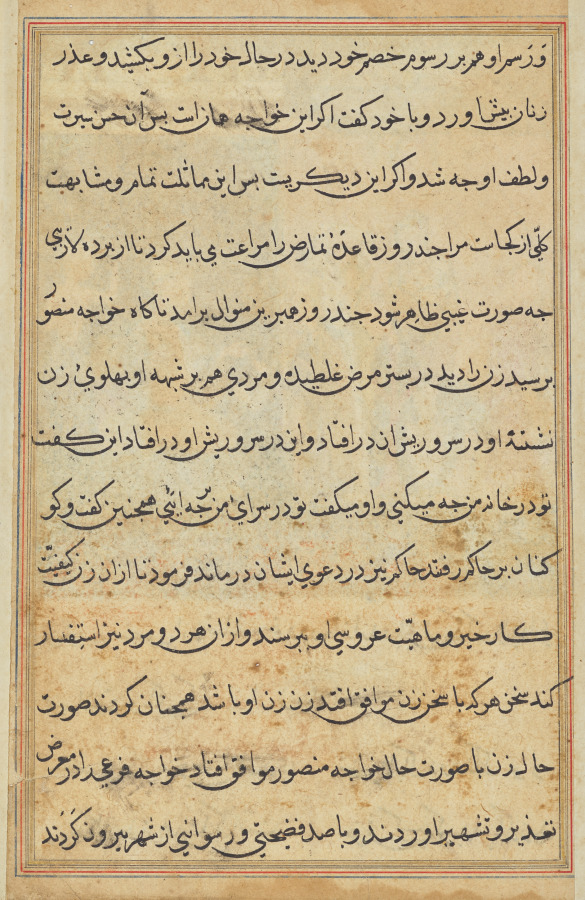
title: Page from Tales of a Parrot (Tuti-nama): text page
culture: Mughal India, court of Akbar (reigned 1556–1605)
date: c. 1560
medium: gum tempera, ink, and gold on paper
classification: Painting